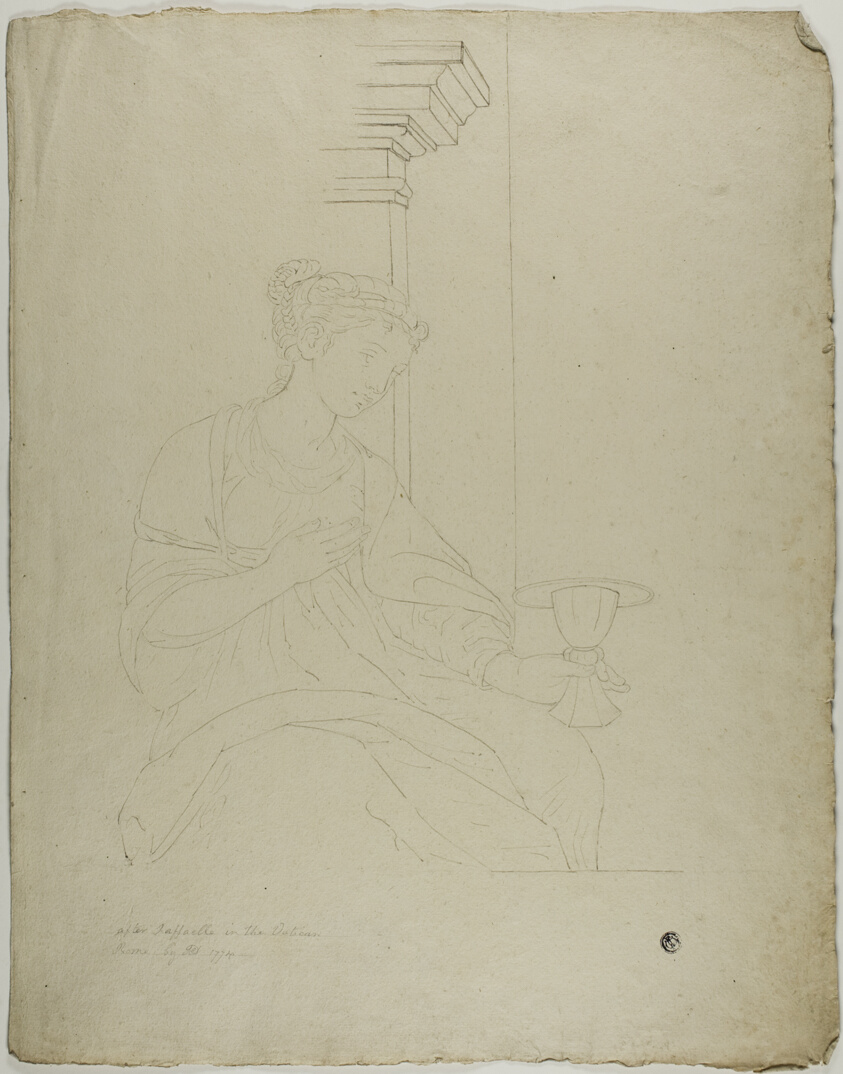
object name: Drawing and Watercolor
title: Faith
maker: John Downman (English, 1750-1824); or after Raffaello Sanzio, called Raphael (Italian, 1483-1520)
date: 1774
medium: Pen and brown ink, with traces of graphite, on ivory laid paper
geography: England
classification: pen and ink drawings; drawings (visual works); prints and drawing